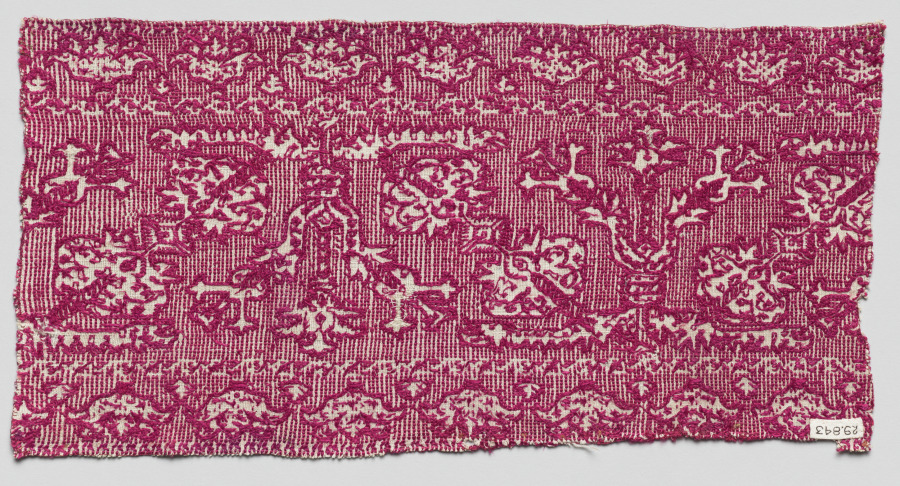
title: Fragment of a furnishing textile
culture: Africa, North Africa, Morocco, Azemmour, Moroccan embroiderer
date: 1800s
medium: Linen, silk, dye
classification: Embroidery